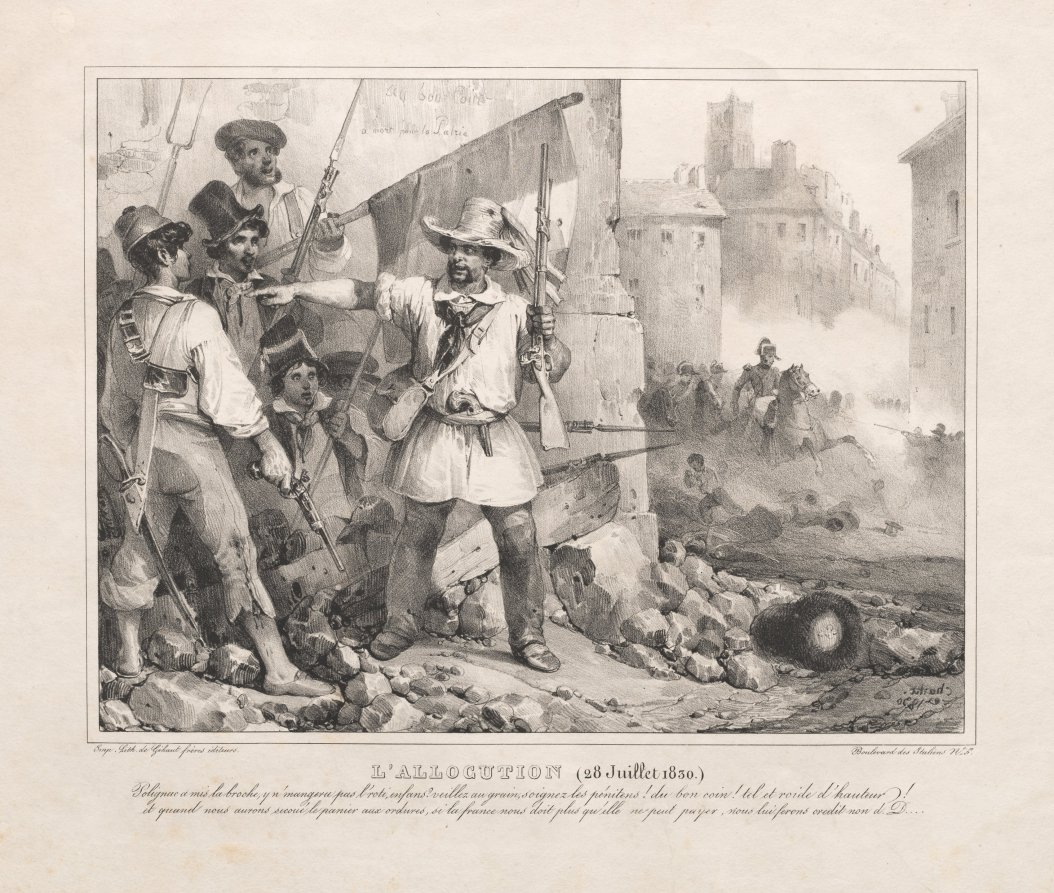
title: Allocution (July 28, 1830)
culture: France, 19th century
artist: Nicolas Toussaint Charlet (French, 1792–1845)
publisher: Gihaut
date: 1830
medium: lithograph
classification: Print